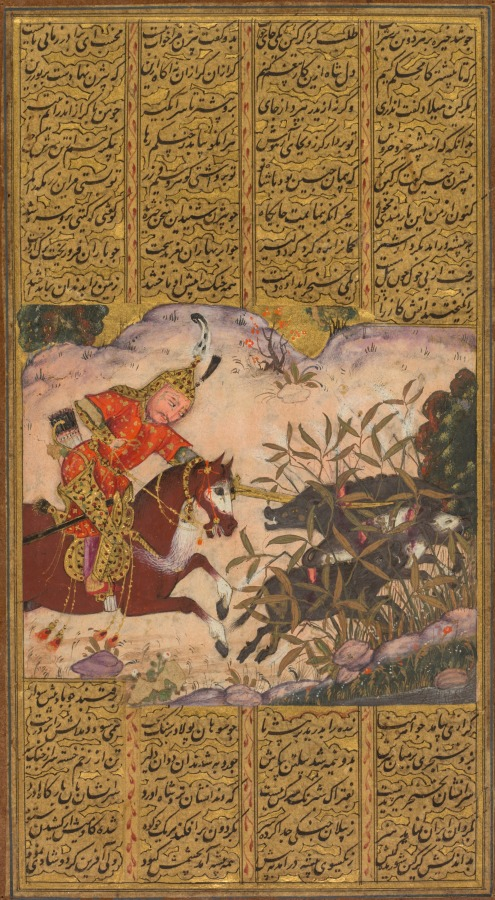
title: Bijan killing the wild boars of Irman, from a Shah-nama (Book of Kings) of Firdausi (Persian, about 934–1020)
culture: India, Bijapur, Deccan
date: c. 1610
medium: Gum tempera, ink, and gold on paper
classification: Painting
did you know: Trappings of Byzantine brocade were gifts to the hero who slays the wild boars.